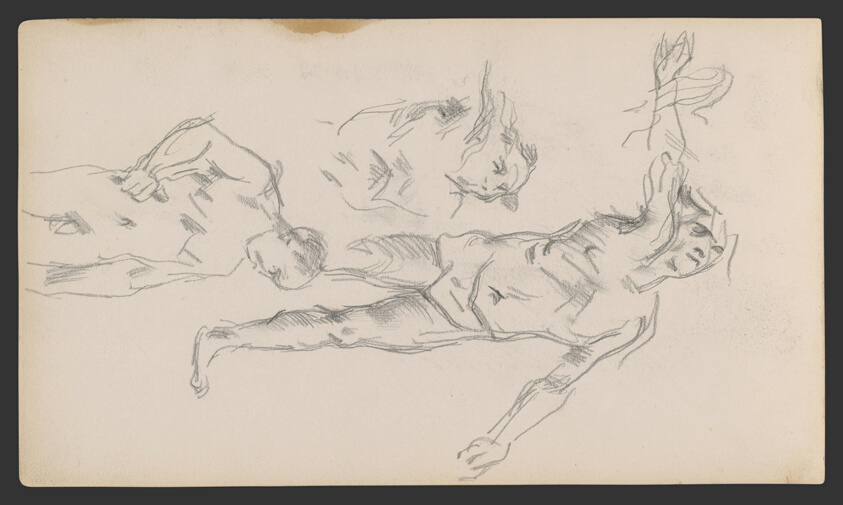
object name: Drawing and Watercolor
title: Sketchbook No. 2 (L'Estaque)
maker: Paul Cézanne; French, 1839-1906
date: 1875–86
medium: Graphite and pen and ink drawings on paper, bound into a book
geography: France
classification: sketchbook; graphite; prints and drawing; paper